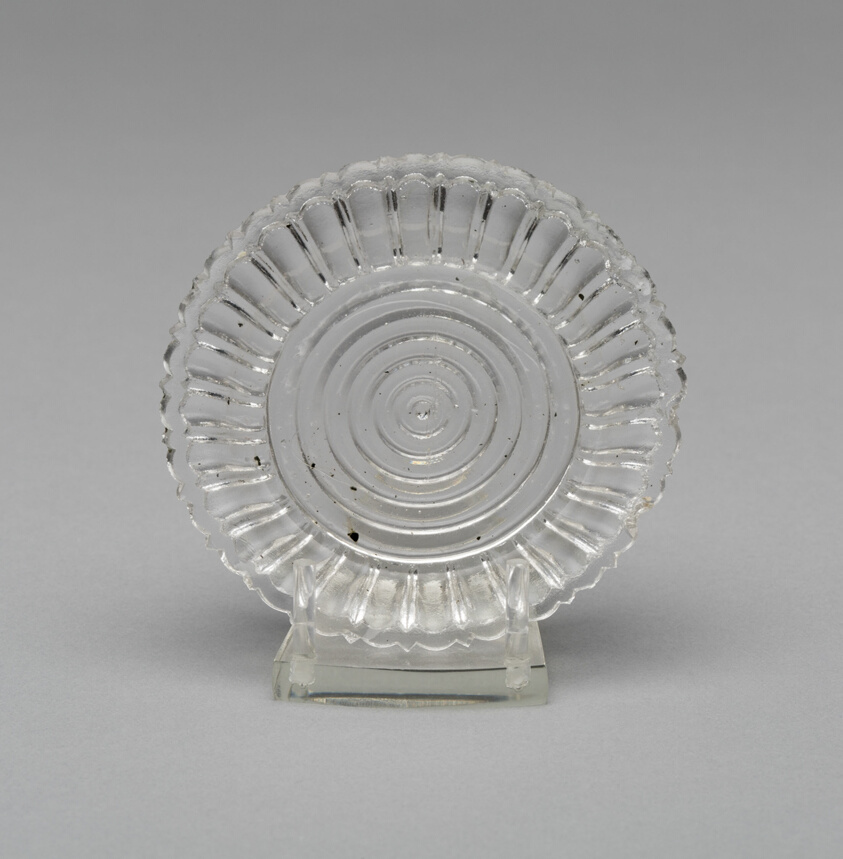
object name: Glass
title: Cup plate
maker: Artist unknown (American, 19th century)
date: 1840–1850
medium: Glass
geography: United States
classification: plate (general, dish); glass; american decorative arts; american arts; decorative arts